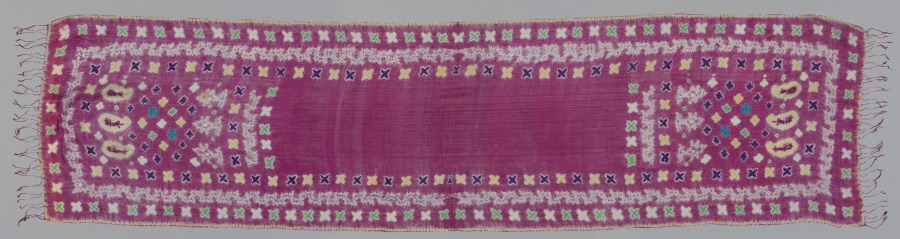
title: Silk Veil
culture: India, 19th - 20th century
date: 1800s - early 1900s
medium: tritik (stitch resist); silk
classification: Textile